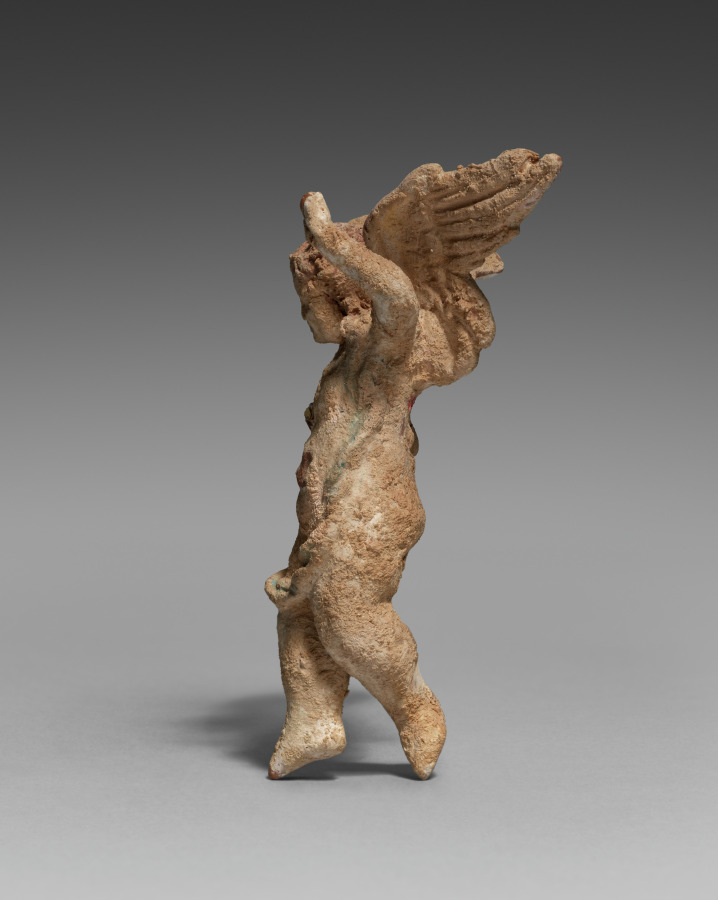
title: Figurine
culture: Greece, Myrina, Hellenistic period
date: late 400s–300s BCE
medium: terracotta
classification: Sculpture